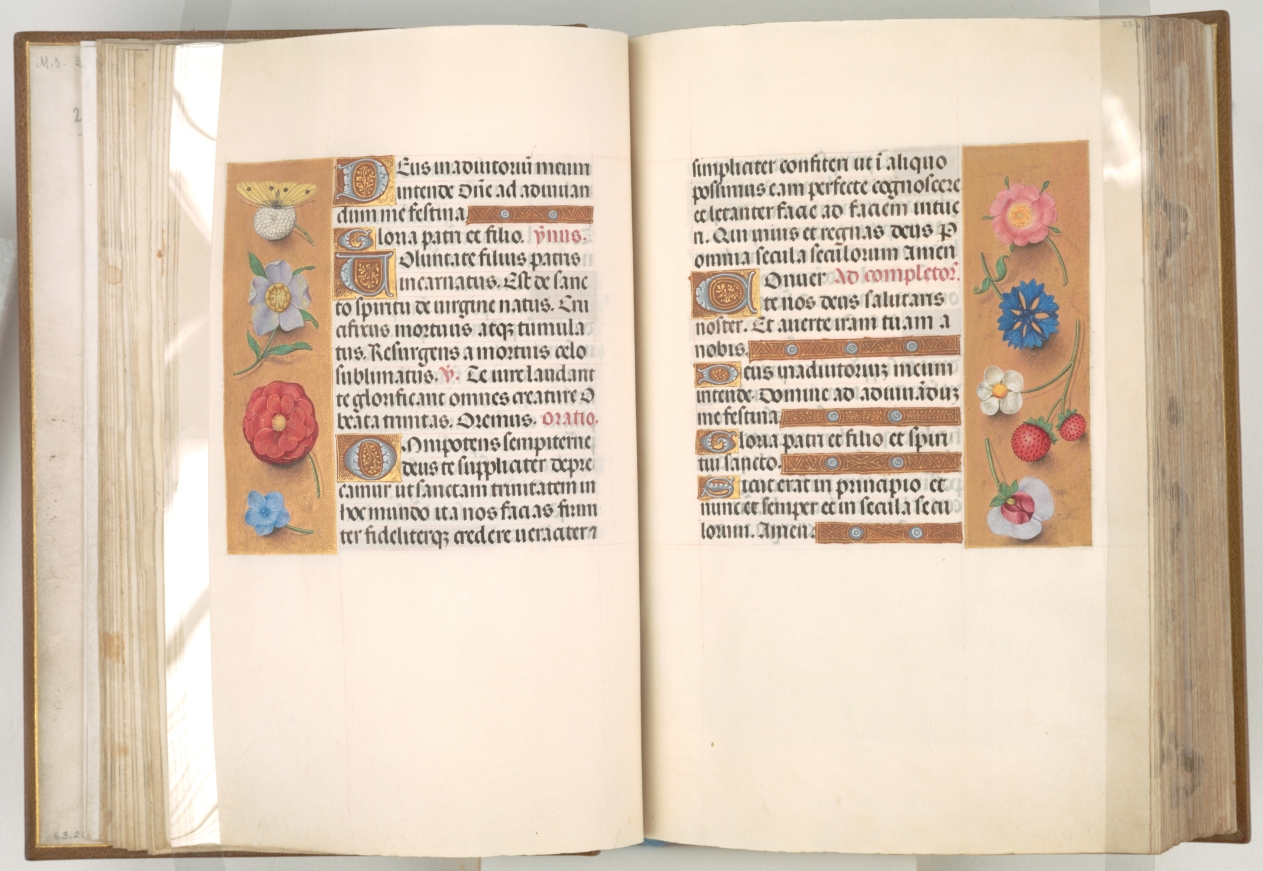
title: Hours of Queen Isabella the Catholic, Queen of Spain: Fol. 21v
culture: Flanders, Ghent and Bruges, late 15th century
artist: Master of the First Prayerbook of Maximillian (Flemish, c. 1444–1519)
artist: and Associates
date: c. 1500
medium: ink, tempera, and gold on vellum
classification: Bound Volume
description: This manuscript was illuminated by a circle of at least five highly organized manuscript painters active in the Flemish cities of Ghent and Bruges. The principal illuminator was Alexander Bening, who painted the majority of the book's miniatures. Manuscripts produced by this circle of artists are renowned for the decoration of their borders, which typically feature a rich variety of realistically-painted flowers, birds, and butterflies. This prayer book, called a book of hours, was intended not for a cleric, but for the private devotions of a lay person-in this case, Isabella the Catholic, Queen of Spain (1451-1504). Isabella's coat of arms embellishes the book's frontispiece. It is unlikely that the book was commissioned by the Queen herself; rather, she probably received it as a diplomatic gift from someone courting her patronage, perhaps Cardinal Francisco Jimenez de Cisneros. A Franciscan friar, Jimenez was dependent upon Isabella for his advancement, first to the post of Queen's confessor in 1492, and then to Archbishop of Toledo in 1495.